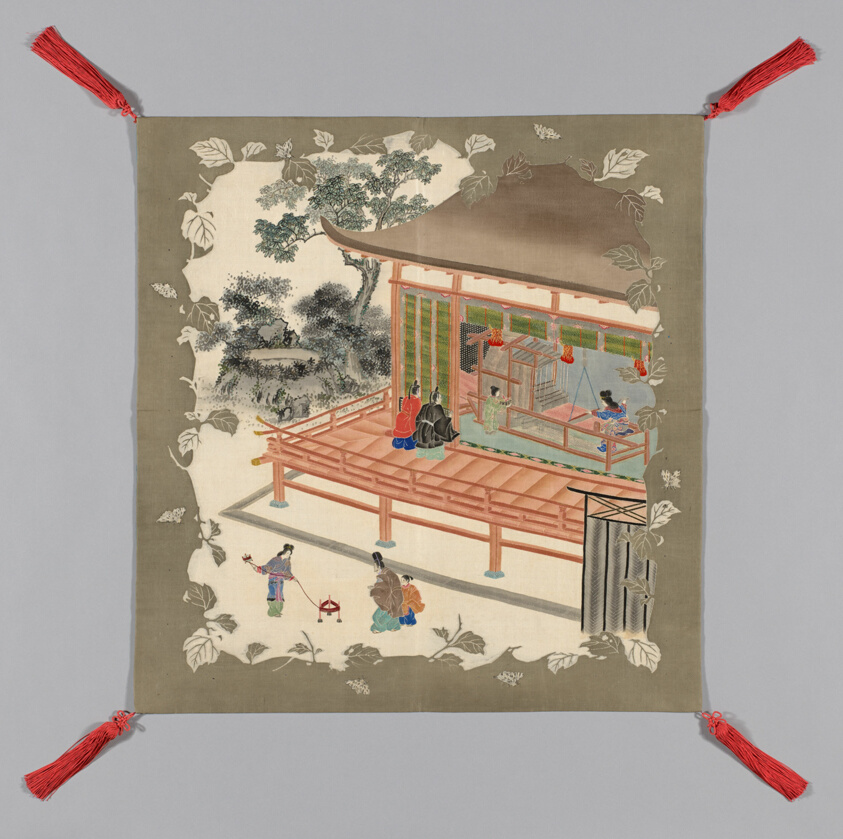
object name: Textile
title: Fukusa (Gift Cover)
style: late edo, Japanism, meiji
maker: Japan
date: late Edo period (1789–1868)/ Meiji period (1868–1912), 1875/1900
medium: Mon side: silk, warp-faced, weft-ribbed plain weave (shioze); resist-dyed, stenciled Patterned side: silk, plain weave (shioze); resist-dyed, stenciled and possibly painted (yûzenzôme); embroidered with silk and gold-leaf-over-lacquered-paper-strip wrapped silk in knot, single satin and stem stitches; laidwork and couching; tasseled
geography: Japan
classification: textile; needlework (visual works); weaving